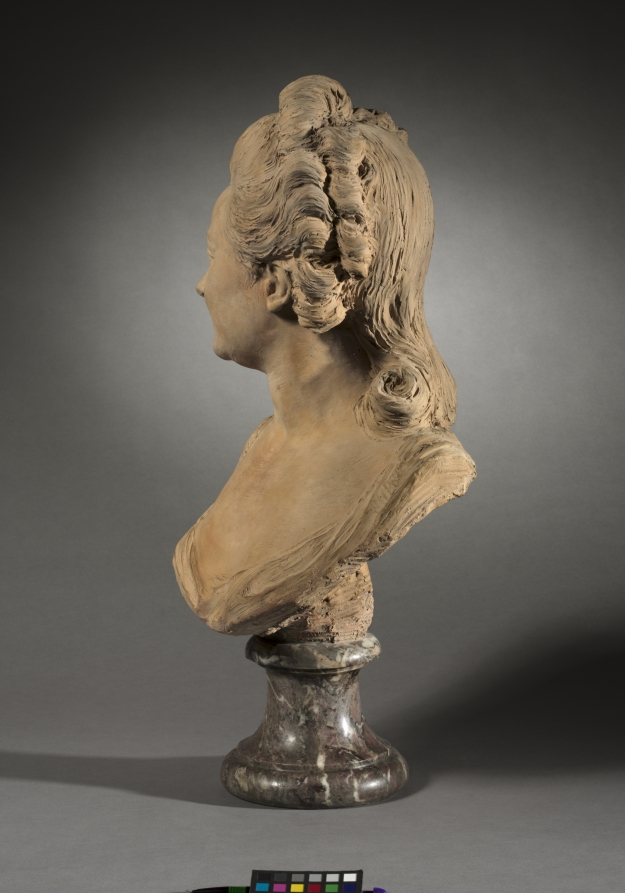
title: Portrait of Melle de Vandeul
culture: France, 18th century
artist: Jean-Baptiste Lemoyne (French, 1704–1778)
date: possibly 1760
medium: terracotta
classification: Sculpture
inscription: Signed underneath shoulder: J. B. Lemoyne (incised).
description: Lemoyne specialized in portrait busts of wealthy Parisians. In this case, the sitter is a close relative of important French critic and writer Denis Diderot.